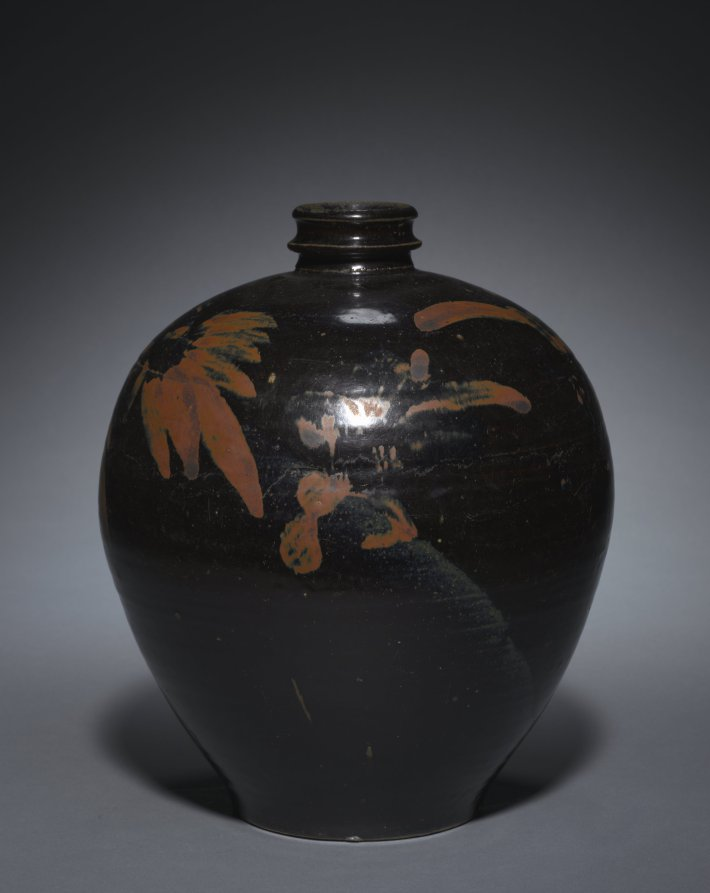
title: Jar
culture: Northern China, Jin dynasty (1115-1234)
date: 1100s–1200s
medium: Glazed stoneware with black slip and iron-brown painted decoration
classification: Ceramic